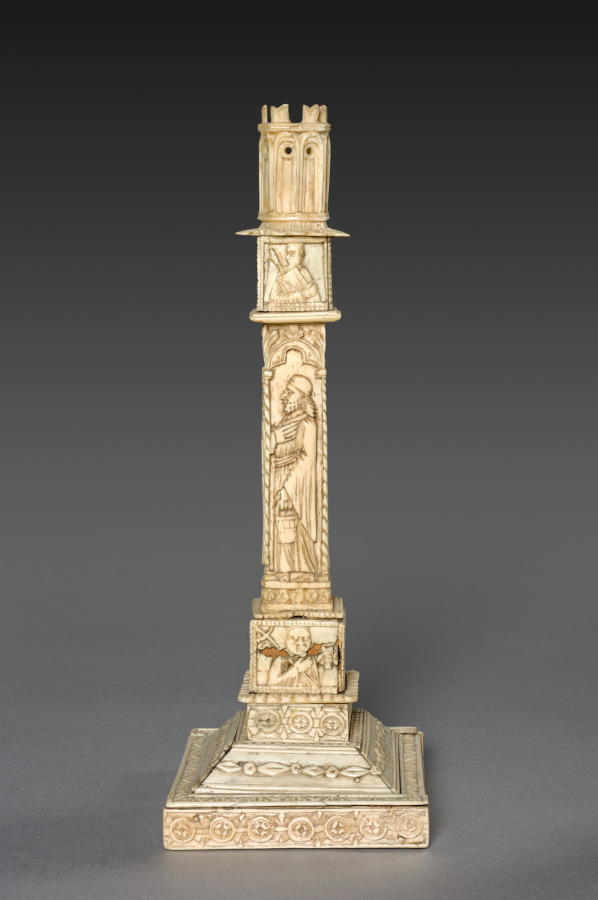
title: Candlestick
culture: Italy, 15th century style (possibly 19th-early 20th century)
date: 1800s - early 1900s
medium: ivory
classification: Ivory